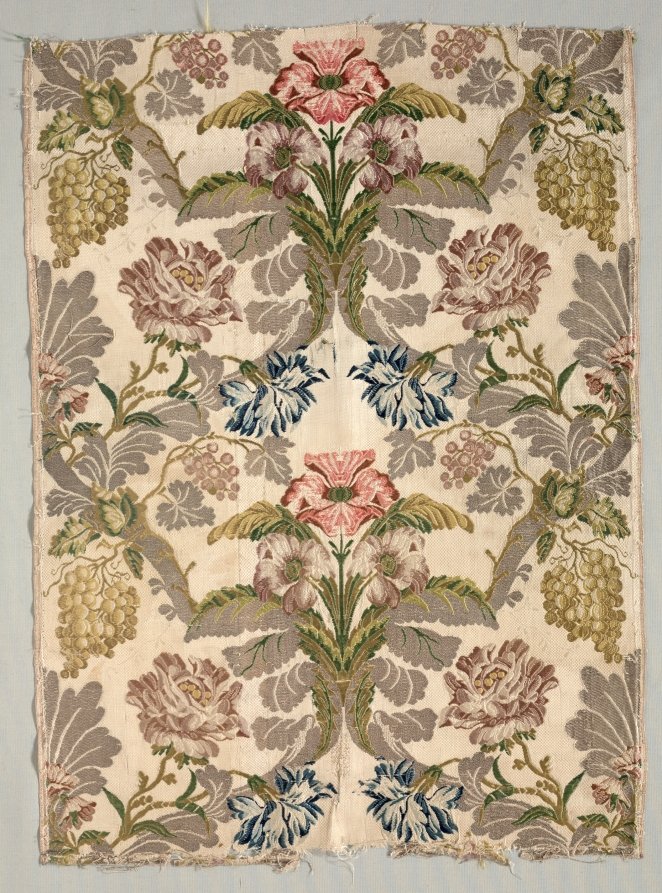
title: Length of Brocade Textile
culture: France or Spain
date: 1700s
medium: plain compound cloth, brocaded: silk and metal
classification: Textile